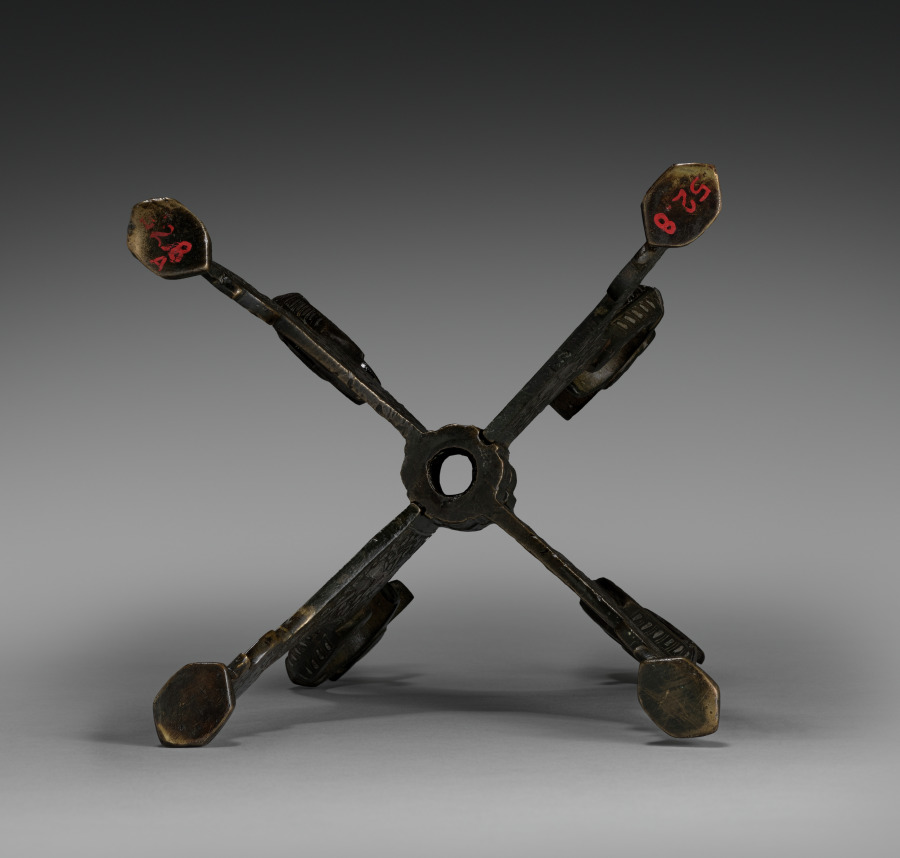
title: Dragon-headed Stand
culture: Northern Iraq or Syria, Zangid (1127–1251) or Ayyubid period (1171–1260)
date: 1200s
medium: cast brass inlaid with silver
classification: Metalwork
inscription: None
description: Themes of hunting and combat are evoked by this stand with gaping dragon heads and figures armed with swords and spears.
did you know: The four-legged stand has two interlocking parts.